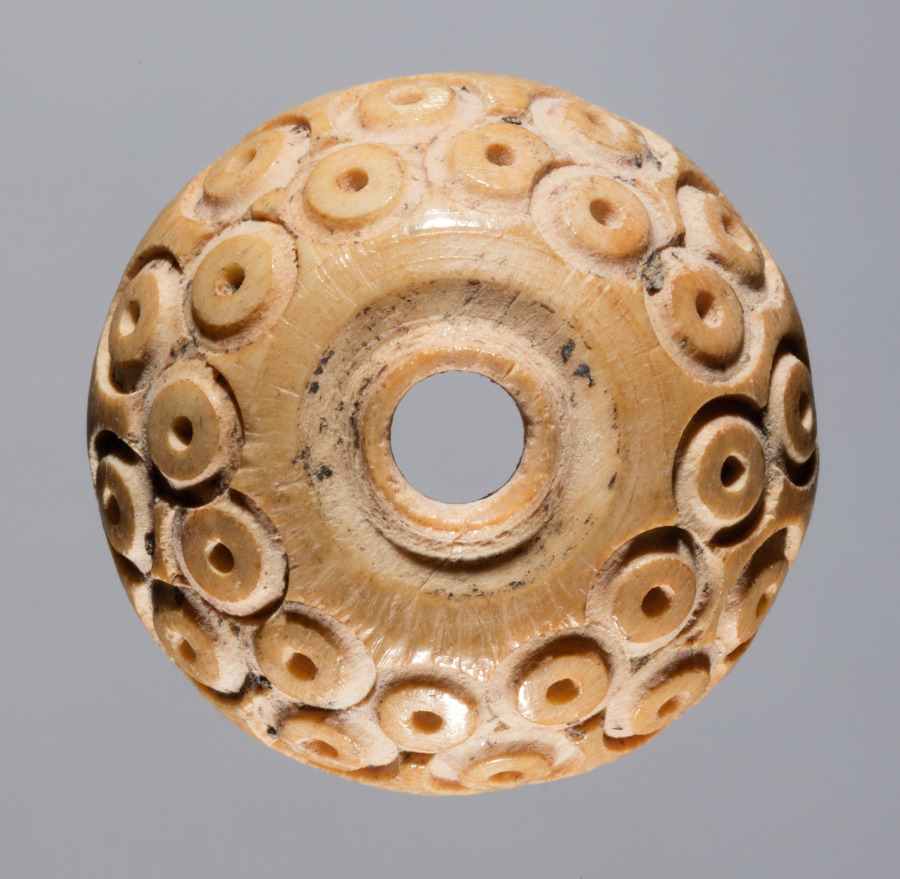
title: Spindle Whorl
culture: Iran, early Islamic period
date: 700s - 900s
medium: bone, incised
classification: Spindle Whorl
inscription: "Sarn" or "Sam" written on bottom by Herzfeld.